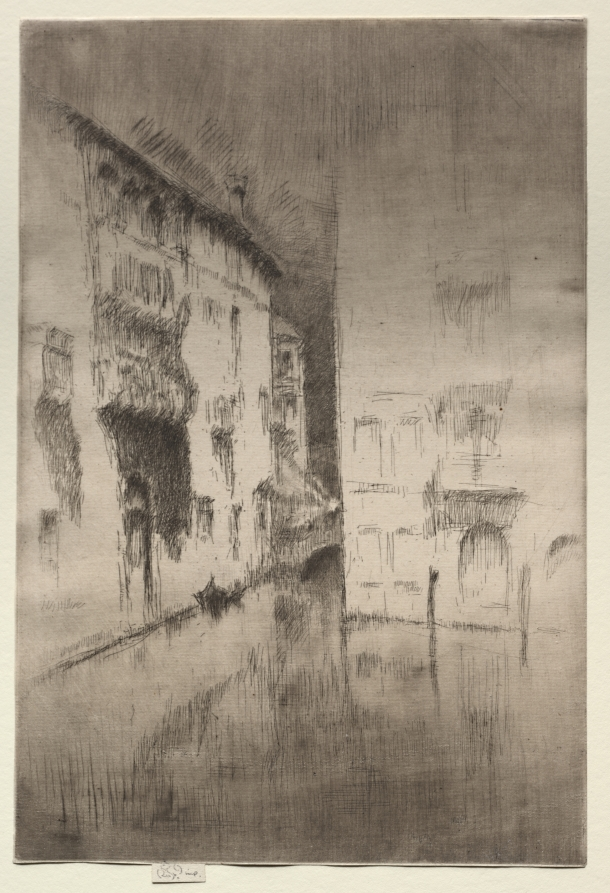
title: Nocturne: Palaces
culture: America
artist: James McNeill Whistler (American, 1834–1903)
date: c. 1880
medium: etching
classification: Print